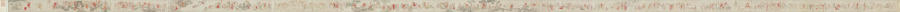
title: The Five Hundred Arhats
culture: China, Ming dynasty (1368–1644)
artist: Wu Bin (Chinese, active c. 1591–1626)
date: 1591–1626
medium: Handscroll; ink and color on paper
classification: Painting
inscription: 枝隱頭陀吳彬齋心拜寫 [印]吳彬之印; 文中父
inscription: 7 seals of Qianlong emperor (r. 1736–95): Gu xi tian zi 古希天子; Shou 壽; Qianlong jian shang 乾隆鑑賞; San xi tang jing jian xi 三希堂精鑑璽; Yi zi sun 宜子孫; Tai shang huang di zhi bao 太上皇帝之寳; Qian qing gong bao 乾清宮寶.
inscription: 6 seals of Cheng Qi 程琦 (1911–1988): Ke an geng zi wu shi yi hou suo de ming ji 可菴庚子五十以後所得名跡; 5 other Cheng Qi seals.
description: More than 66 feet long, this handscroll depicts 447 luohans, 72 attendants, and the bodhisattva of compassion at its very end. Luohans (arhats in Sanskrit), disciples of the Buddha and protectors of the Buddha’s law, possess supernatural powers and take on myriad external appearances. The amusing assortment of characters are engaged in an array of religious, secular, and miraculous activities. The painter used stylistic features borrowed from earlier artists, carefully controlled lines, and refined coloring. Wu Bin was a lay Buddhist and depicting this sort of image was part of a religious practice seeking understanding of the Buddha’s teaching.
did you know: Far advanced on the path to enlightenment, arhats have the capacity to tame tigers, free dragons, and to float on water or in the air.